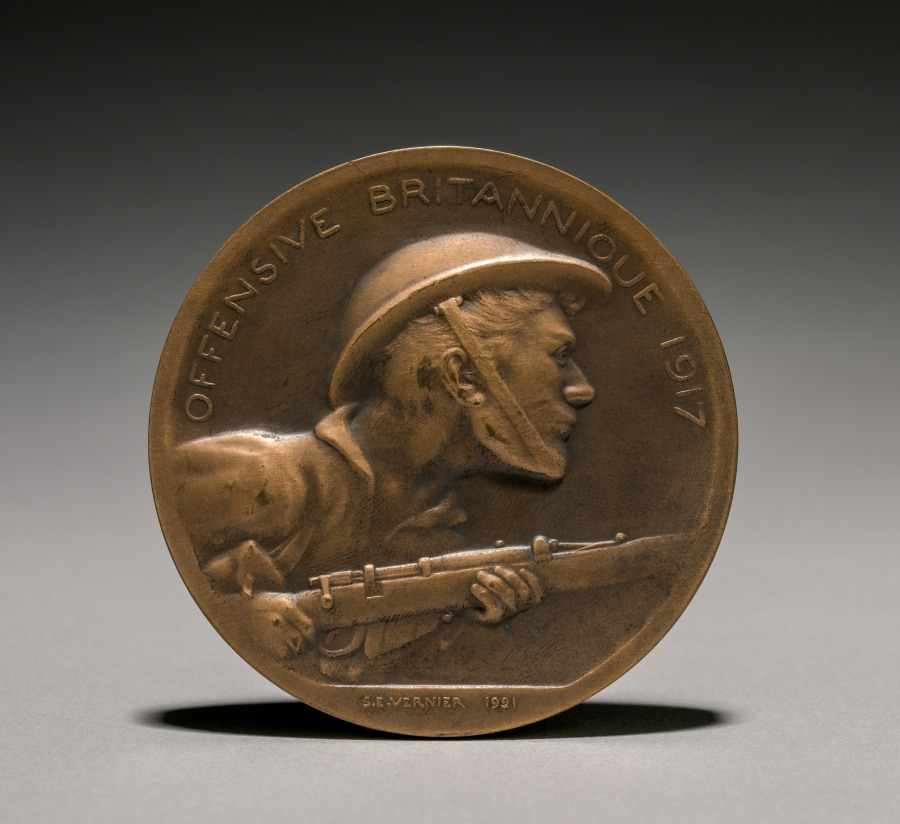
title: Medal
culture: France, early 20th century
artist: Èmile Séraphin Vernier (French, 1852–1927)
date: 1921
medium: bronze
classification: Metalwork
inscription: obverse - "Offensive Brittanique 1917"; signed: "S. E. Vernier, 1921." reverse - "Vimy, Arras, Ypres, Marechal Sir Douglas Haig, Generaux Sir Henry Horne, Sir Herbert Plumer, Sir Julian Byng, Sir Hubert Gough."